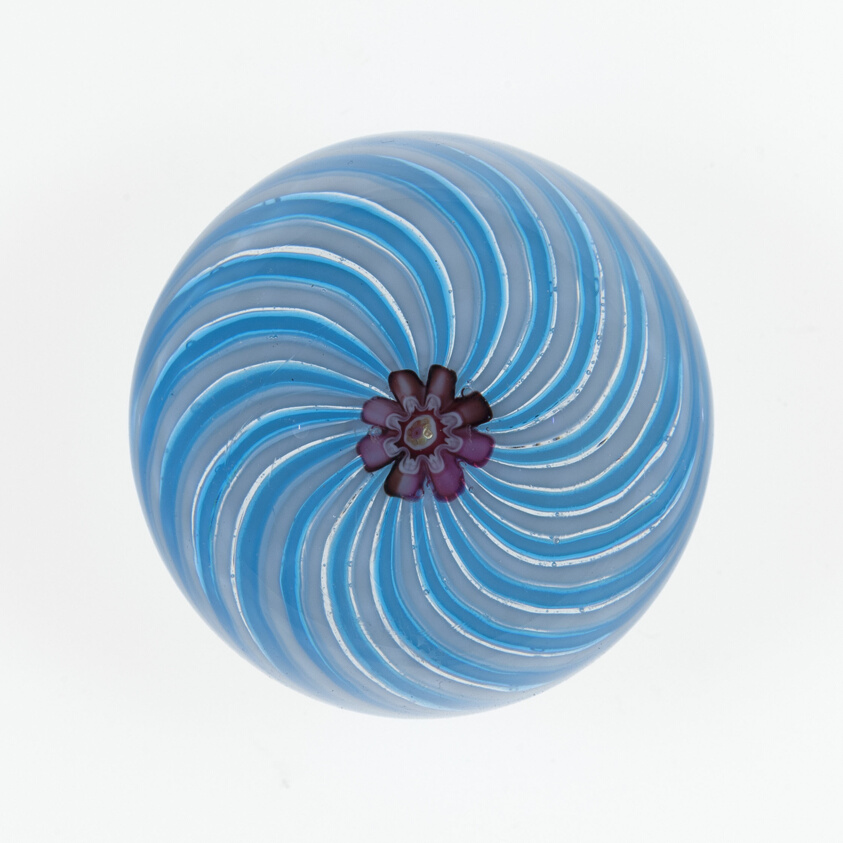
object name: Glass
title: Paperweight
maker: Clichy Glassworks (Cristalleries de Clichy); Clichy, France, 1837-1885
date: c. 1845–60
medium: Glass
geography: Clichy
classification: paperweight; glass